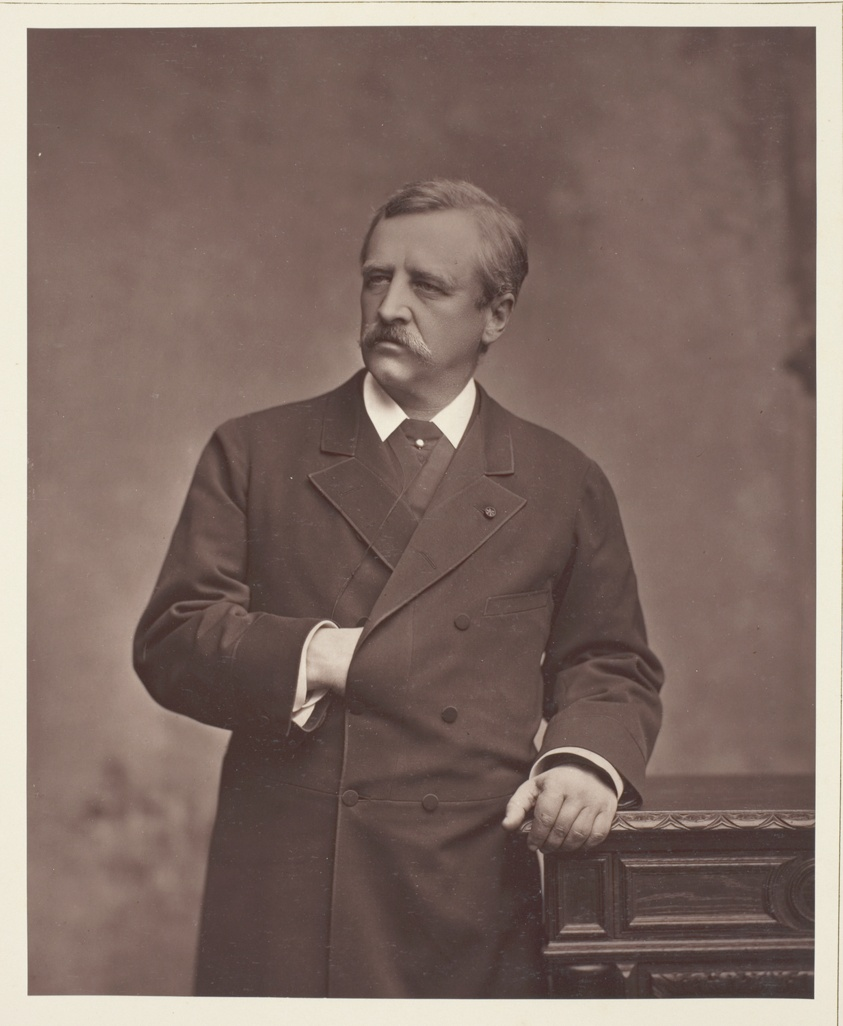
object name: Photograph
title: A. E. Nordenskiold (Swedish geologist and mineralogist, born Finland, 1832-1901)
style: 19th century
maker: Benque et Klary (French, 19th century)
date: c. 1880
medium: Woodburytype, from the periodical “Galerie Contemporaine Littéraire, Artistique" (1880), volume 1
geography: France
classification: woodburytype; photomechanical process; photography; photograph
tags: Collected by Hugh Edwards, Contemporaine Littéraire